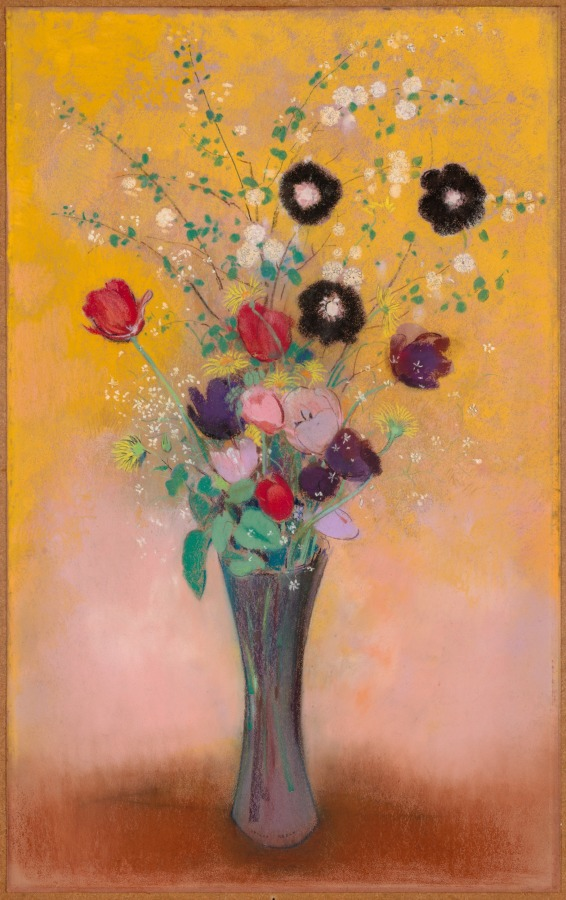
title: Vase of Flowers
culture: France, 20th century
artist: Odilon Redon (French, 1840–1916)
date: 1916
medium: pastel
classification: Drawing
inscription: signed on base of flower: ODILON REDON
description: Inspired by Cleveland’s groundbreaking acquisitions of Odilon Redon’s artworks during the 1920s, local philanthropist and collector Leonard C. Hanna Jr. purchased this luminous pastel of a floral still life in 1937. Hanna acquired it from Jacques Seligmann, a dealer based in New York City and Paris who was fundamental in bringing 19th-century French art to American audiences. In 1939, Hanna loaned the pastel to the New York World’s Fair, where it represented Redon’s work. Those who saw it there were attracted to the vivid color and timeless subject, which preoccupied the artist at the end of his life.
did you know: Redon was inspired to depict flowers after meeting the botanist Armand Clavaud, a cataloguer of plant species in the artist's native region of Bordeaux